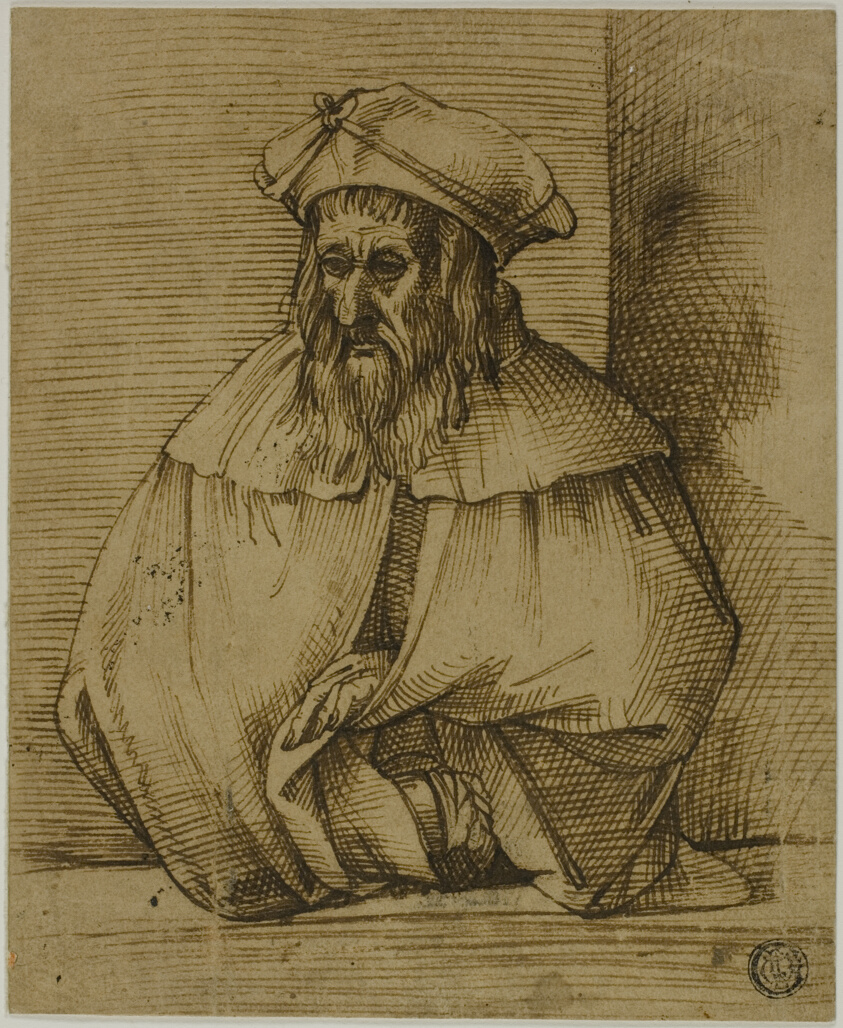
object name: Drawing and Watercolor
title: Half-Length Sketch of a Gentleman Wearing Hat and Cape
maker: Bartolomeo Passarotti (Italian, 1529-1592)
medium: Pen and brown ink on tan laid paper, laid down on ivory laid paper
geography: Italy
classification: pen and ink drawings; drawings (visual works); prints and drawing